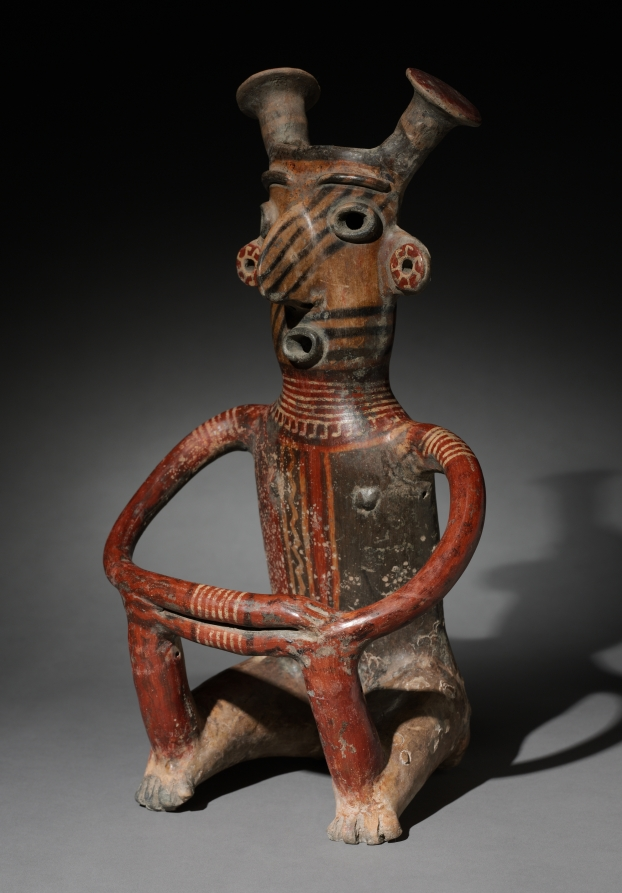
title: Seated Male Figure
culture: Mexico, Jalisco, Zacatecas Style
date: c. 200 CE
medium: earthenware with colored slips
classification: Sculpture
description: A female once accompanied this abstract male. The two may have had the same meaning as the nearby couple. They were also similarly linked by physical form, though the female’s head had no projections, the meaning of which is unknown. The size of the circle formed by the arms suggests that the figure once held something, perhaps a perishable offering.